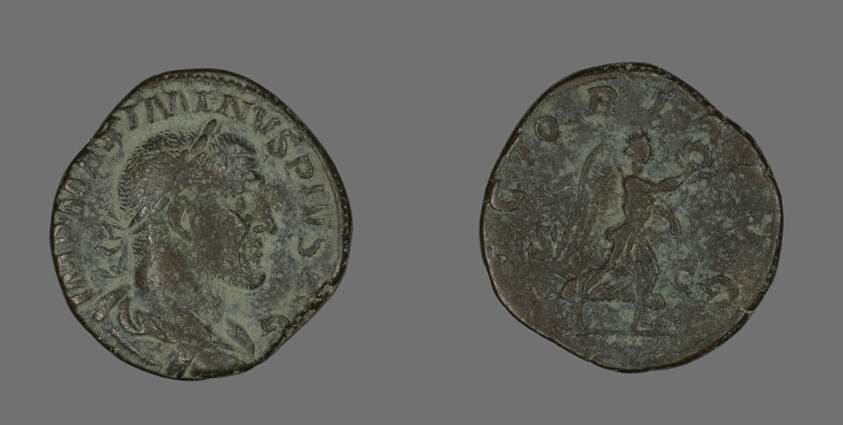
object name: Coin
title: Sestertius (Coin) Portraying Emperor Maximinus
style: roman (ancient, style or period)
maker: Roman, minted in Rome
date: 235-236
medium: Bronze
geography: Roman Empire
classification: coin; ancient art